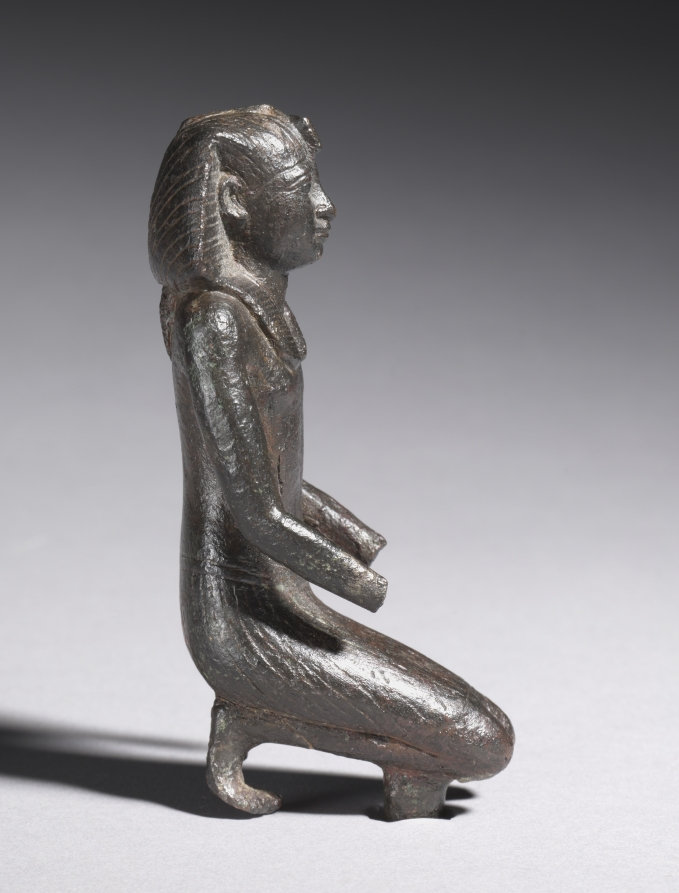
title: Statuette of Kneeling King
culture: Egypt, Greco-Roman period (332 BCE–395 CE), Ptolemaic dynasty (305–30 BCE)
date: 304–30 BCE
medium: bronze, solid cast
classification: Sculpture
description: As the chief intermediary between gods and men, the Egyptian king is often shown kneeling in adoration. Enough remains of this king's arms to indicate that his hands may have held offering jars or were extended with the palms facing each other around a naos, or shrine, containing a divine image. In Egypt, adoration required a divine recipient. This example was undoubtedly part of a group composition in which the king faced a larger figure of a god.